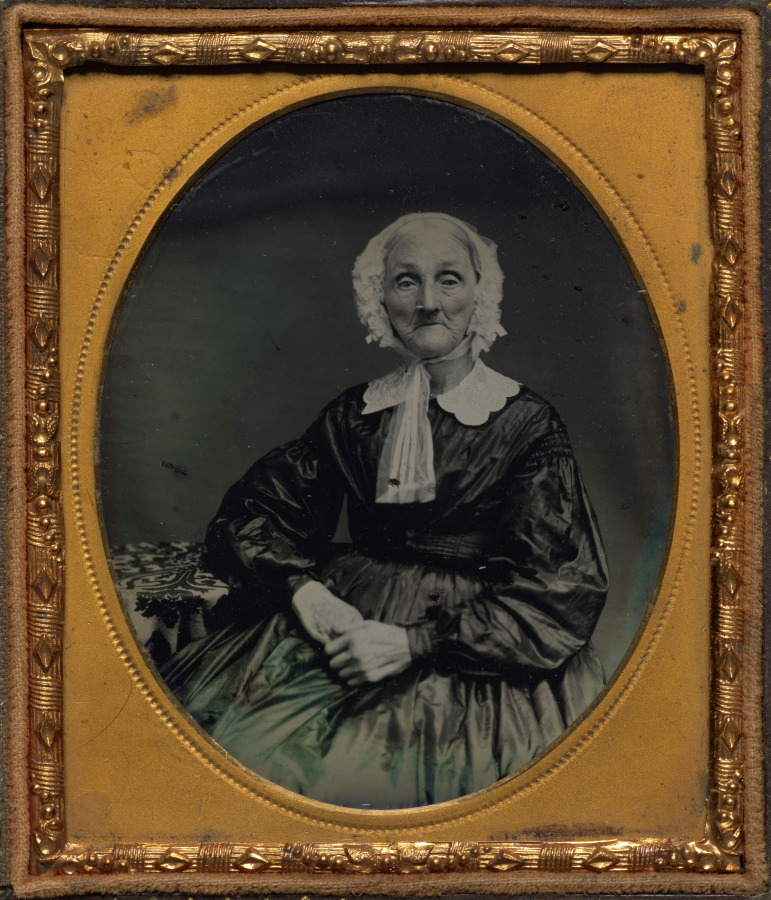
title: Seated old woman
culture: America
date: c. 1864–65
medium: ambrotype, tinted, sixth plate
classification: Photograph